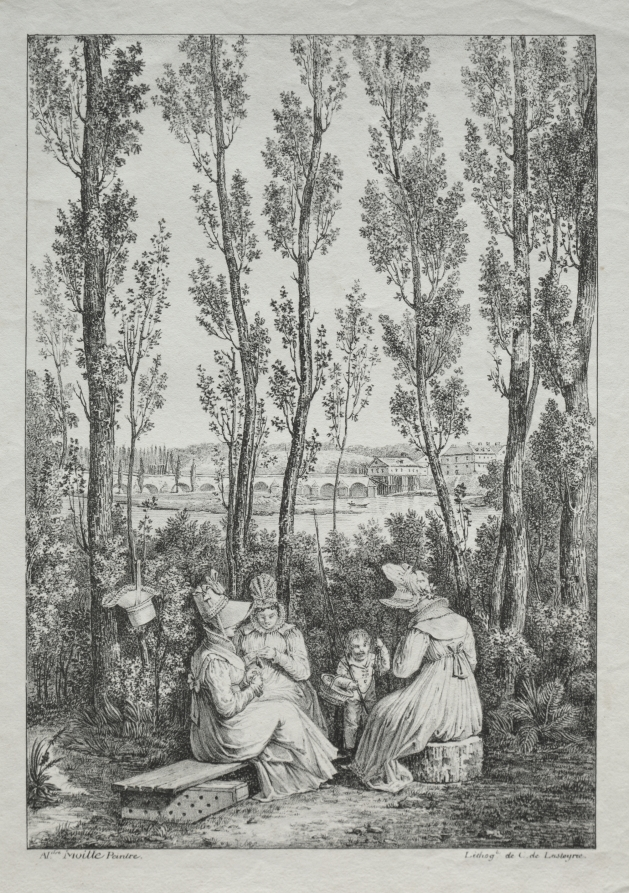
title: The Picnic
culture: France, 19th century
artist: Charles Philibert Lasteyrie du Saillant (French, 1759–1849)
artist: after Alexandre Moitte (French, 1750–1828)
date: c. 1810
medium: lithograph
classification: Print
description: Lithography did not really get under way in France until 1816 when Lasteyrie and Godefroy Engelmann, both trained in the shop of lithography inventor Alois Senefelder (1771-1834) in Germany, opened separate lithographic establishments in Paris. Antoine-Jean Gros and Carle and Horace Vernet were among the earliest artists engaged by Lasteryrie and Godefroy to draw original designs upon the lithographic stone.